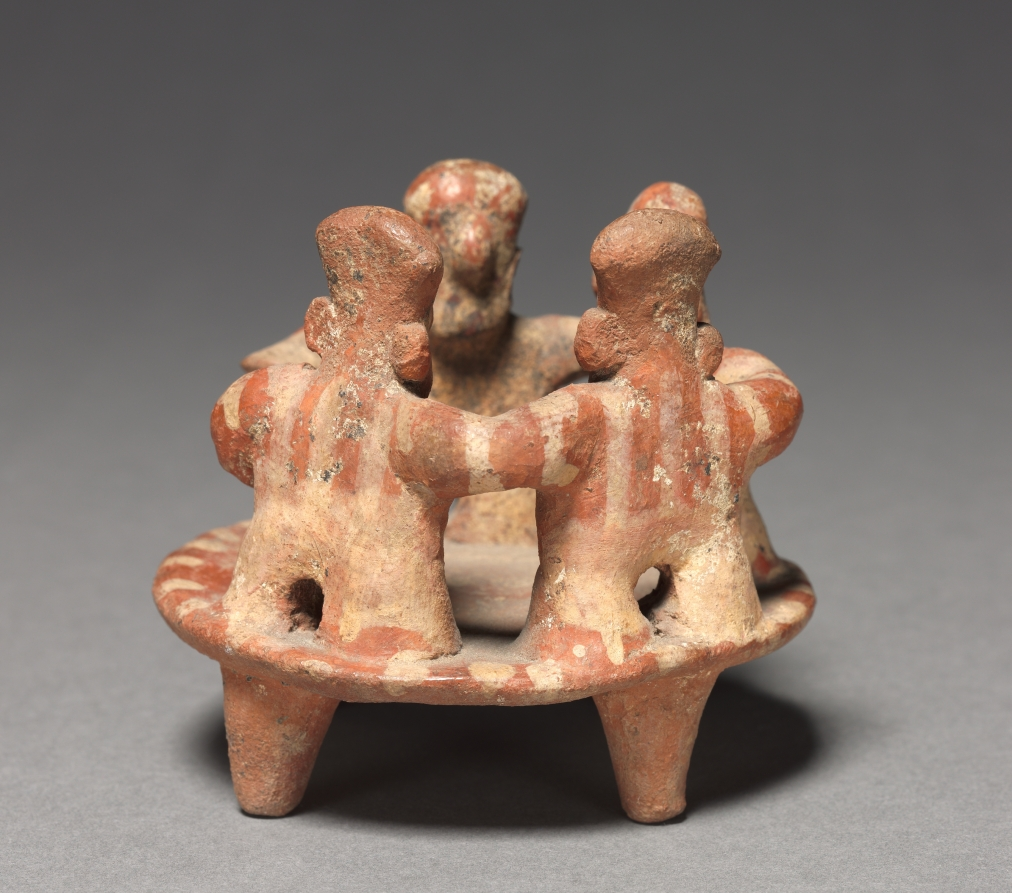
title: Dancing Group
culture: Mexico, Western Nyarit, 5th-6th Century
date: 400s-500s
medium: terracotta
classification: Sculpture